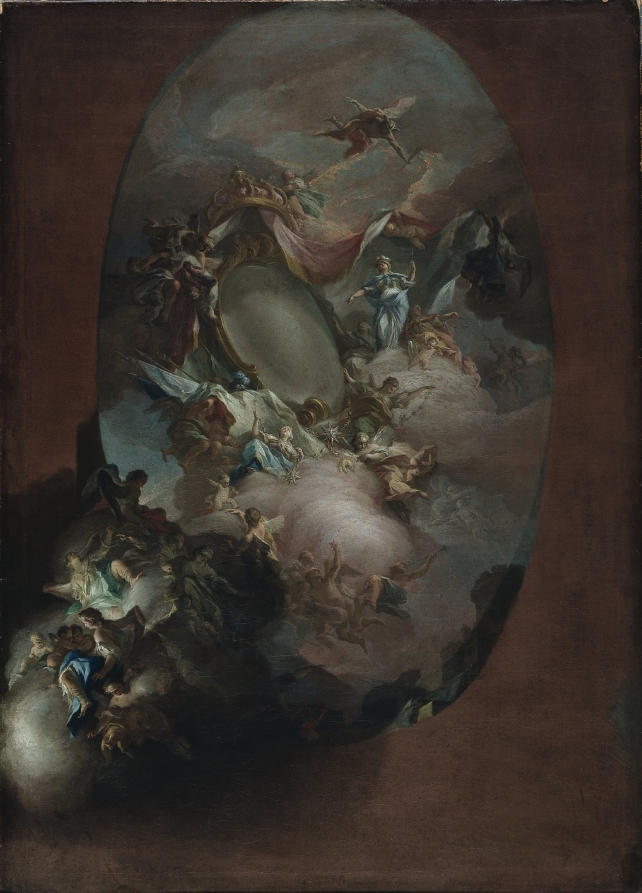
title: Study for "The Apotheosis of Ferdinand IV and Maria Carolina, King and Queen of Naples" (for the Palazzo dei Regi Studi, Naples)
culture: Italy, 18th century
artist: Pietro Bardellino (Italian, 1728–1810)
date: c. 1781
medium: oil on canvas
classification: Painting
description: This large oil painting was thought to be an early, rough sketch for the ceiling of the Salone de Biblioteca Antica in the Palazzo degli Studi in Naples. The attribution to Bardellino was based on the sketch's similarity to another sketch by the artist, sold in New York in 1972, which is more closely related to the ceiling painting. It is assumed that the Cleveland work preceded the more finished oil sketch and that both models were created in preparation for the Palazzo degli Studi's Apotheosis, completed in 1781. The Cleveland sketch was almost completely altered in the final composition. The cartouche, or grouping of regal paraphernalia, which is the main feature of the Cleveland sketch, was omitted in the final ceiling painting. This medallion conveys the idea that the reign of the royal couple is filled with fortune. Bardellino used atmospheric colors and his delicate touch in this heavenly vision of angels and virtues, and the angels hold a chain bearing the orders of the royal family. From left to right are the Order of San Januarius, the Order of the Holy Spirit of France, the Order of the Golden Fleece (represented by the lamb), and the Order of St. George of Constantine. The large oval shape, empty in the Cleveland sketch, also appears in the final version, where the oval is smaller and frames a portrait of Ferdinand and Maria. Rather than representing an apotheosis of the bodies of the royal couple, Bardellino shows their ascent in the raising of their portraits to heaven. While the Palazzo degli Studi painting differs greatly from the Cleveland version, the oval space in the Cleveland sketch suggests Bardellino's plans for the inclusion of the royal portrait in the final ceiling painting.